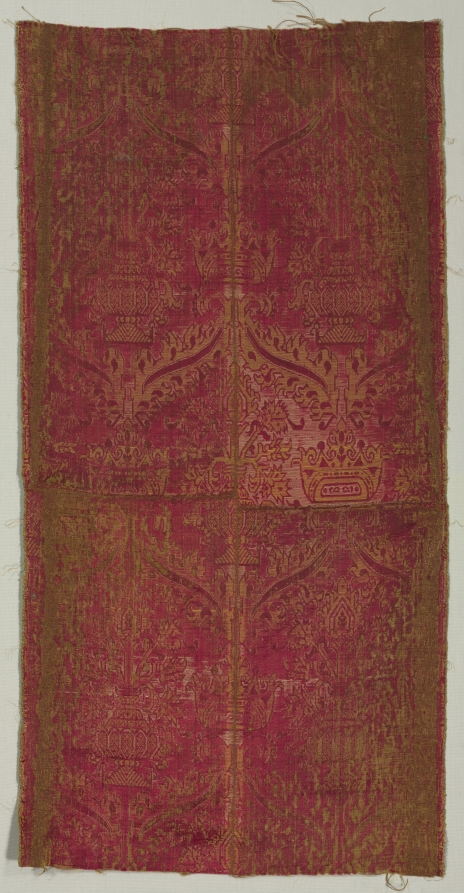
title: Silk and Hemp Fragment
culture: Spain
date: 16th century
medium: plain compound satin (so-called brocatelle): silk and hemp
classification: Textile